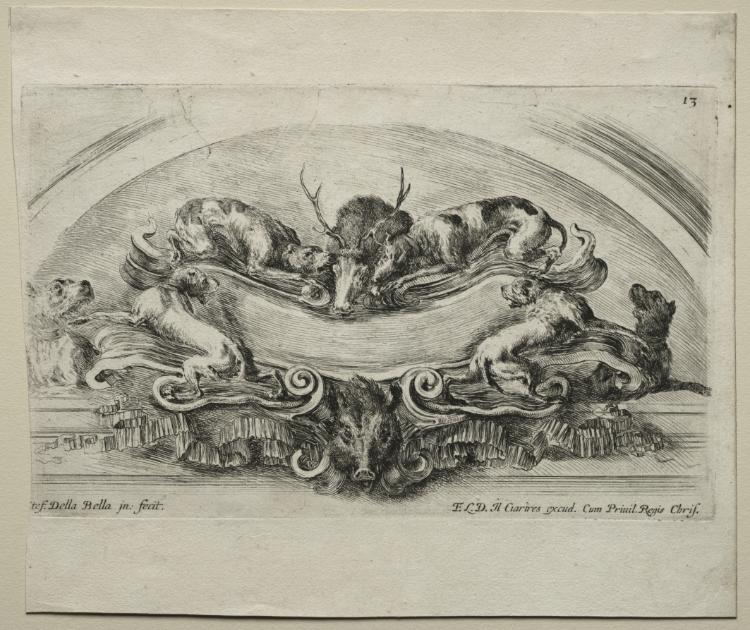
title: Collection of Various Caprices and New Designs of Cartouches and Ornaments: No 13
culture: Italy, 17th century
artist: Stefano Della Bella (Italian, 1610–1664)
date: 1646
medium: etching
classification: Print